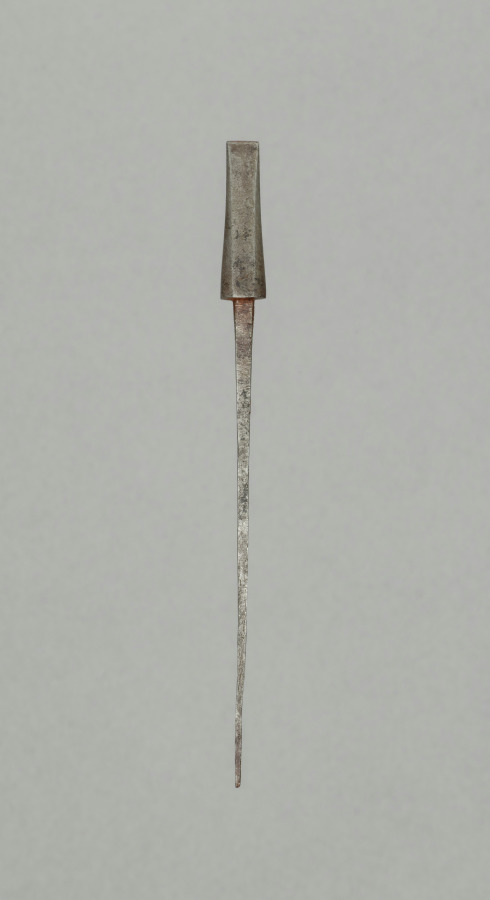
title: Arrow Point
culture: Japan, Edo period (1615–1868)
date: 1700s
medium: steel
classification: Arms and Armor